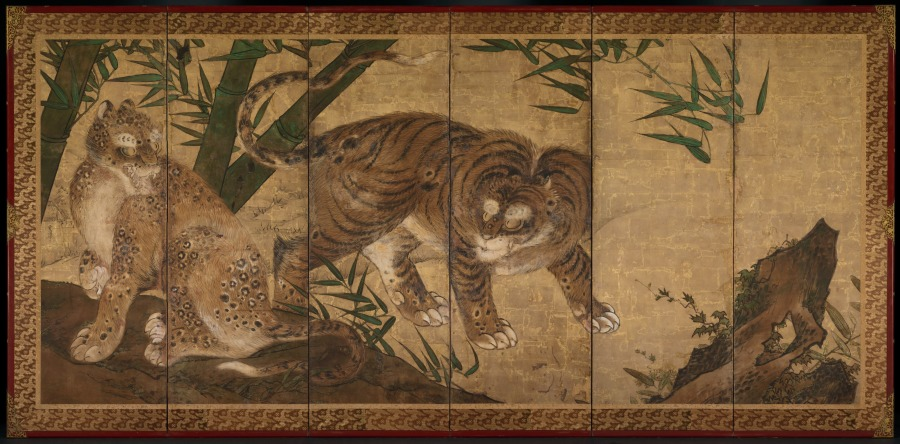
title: Lions and Tigers in Peony and Bamboo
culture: Japan, Edo period (1615–1868)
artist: Yamaguchi Sekkei (Japanese, 1644–1732)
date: 1668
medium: One of a pair of six-panel folding screens; ink and color on gilded paper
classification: Painting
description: Sekkei lived and studied painting in Kyoto at the Kano school studio, the center of traditional painting activity in Japan since 1500. The use of gold foil as a backdrop for the frolicking animals served a practical as well as a decorative function. Because traditional Japanese rooms had no windows, interior lighting came from portable oil lamps and wax candles, whose effects were magnified by reflective surfaces.